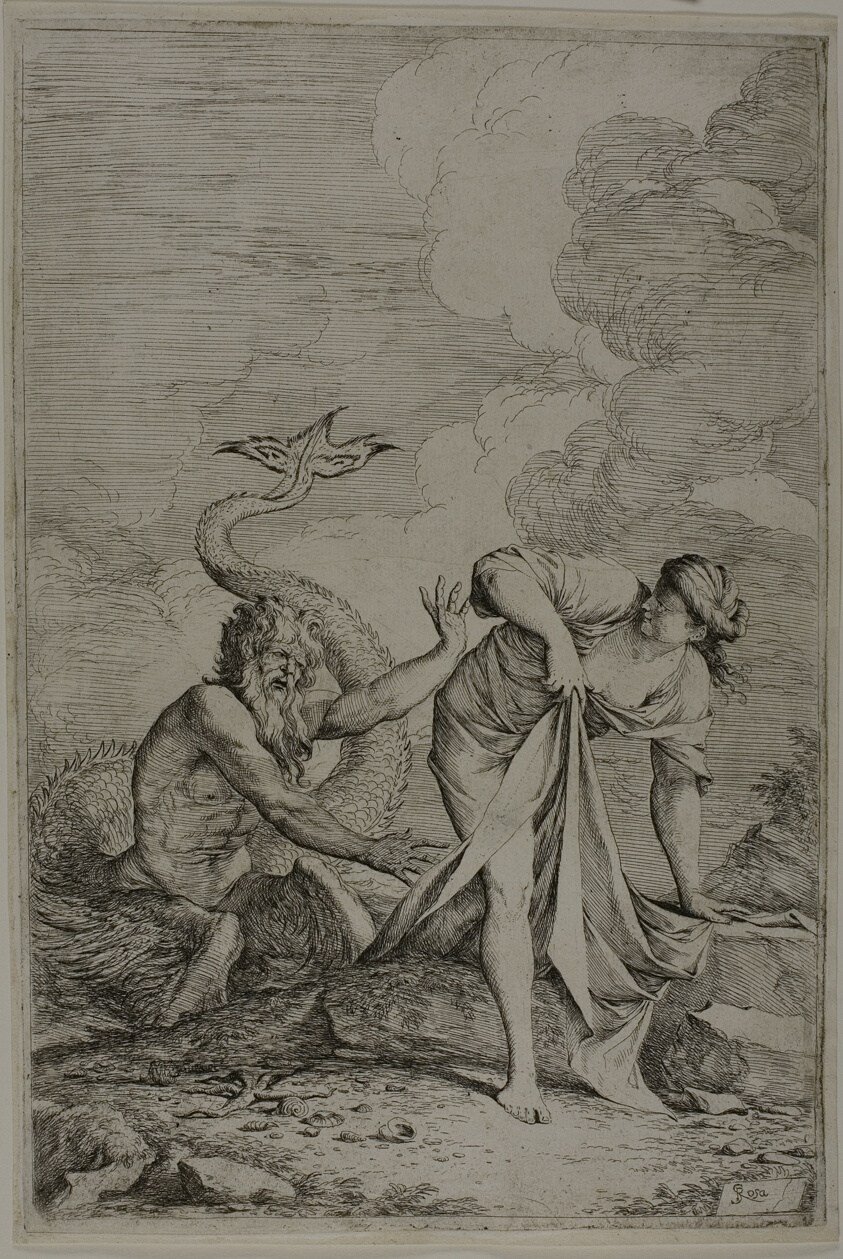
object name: Print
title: Glaucus and Scylla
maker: Salvator Rosa (Italian, 1615-1673)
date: 1661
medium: Etching and drypoint on ivory laid paper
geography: Italy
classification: etching; print; prints and drawing